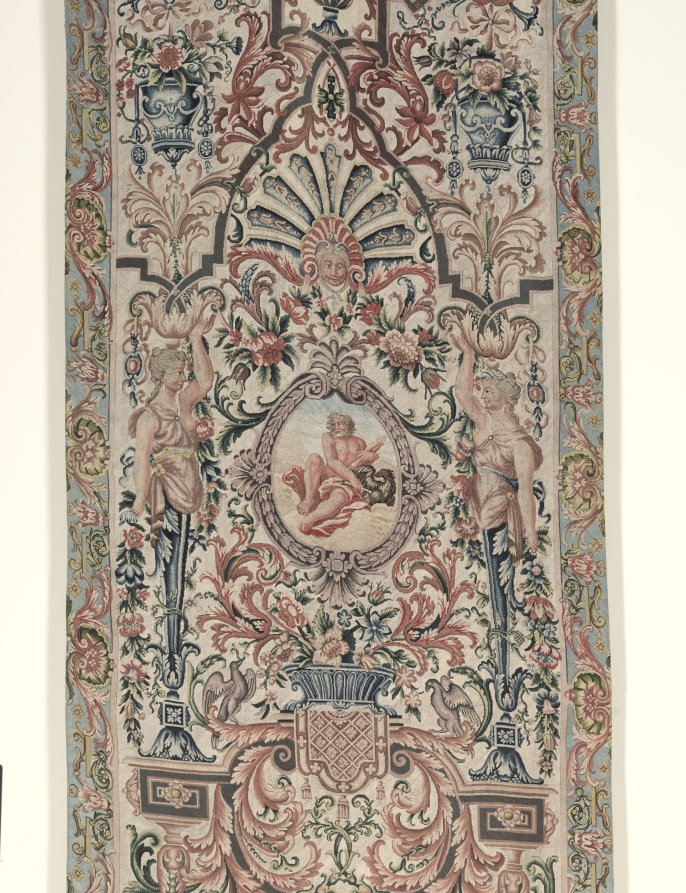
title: Needlework Bed Hanging (1 of 2)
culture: France, late 17th century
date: c. 1690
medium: petit point embroidery; silk and wool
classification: Embroidery